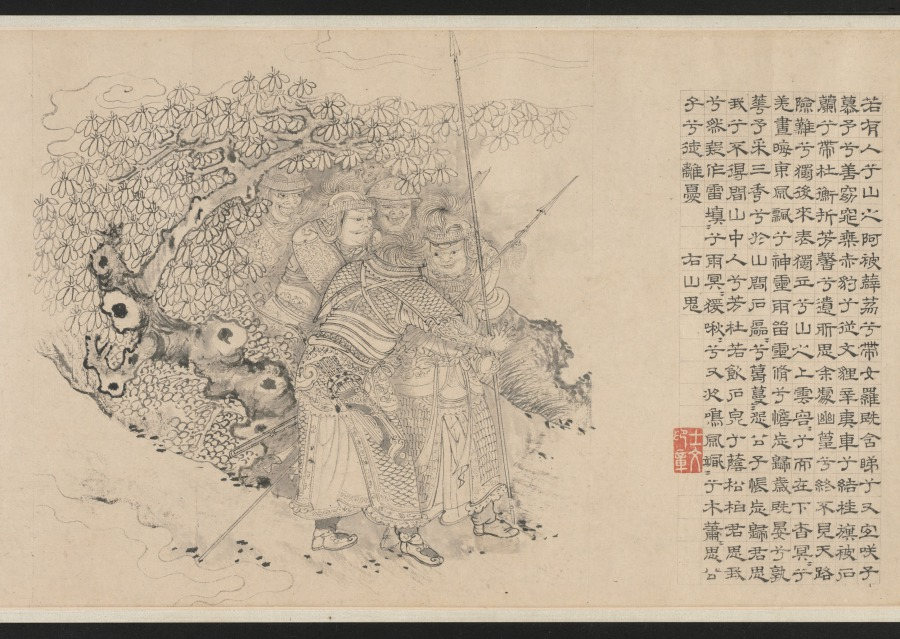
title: Nine Songs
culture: China, Yuan dynasty (1271-1368)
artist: Zhang Wo (Chinese, active c.1336–after 1364)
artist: Chu Huan (Chinese, active 1361)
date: 1361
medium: handscroll; ink on paper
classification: Painting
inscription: 7 colophons and 47 seals: 1 colophon, dated 1361, and 28 seals of Chu Huan 褚奐 (active c. 1361); 1 colophon, dated 1785, and 1 seal of Lu Shihua 陸時化 (1714-1779); 2 seals of Lu Yü-ch'ing (18th c.); 1 colophon, dated 1935, of Ye Gongchuo 葉恭綽 (1881-1968); 1 colophon, dated 1935, of Wu Hufan 吳湖帆(1894–1968); 1 colophon, dated 1938, and 1 seal of Wang Tongyu 王同愈 (1856-1941); 1 colophon, dated 1941, of Wu Huayuan 吳華源 (1893-1972); 1 colophon, dated 1942, and 9 seals of Xu Bangda 徐邦達 (1911–2012); 1 colophon, dated 1942, of Lang Jingshan 郎靜山 (1892-1995); 1 colophon, dated 1944, of Tang Yun 唐雲 (1910-1993); 6 seals of Wang Jiqian [C.C. Wang] 王季遷 (1907–2003).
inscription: Text of The Nine Songs written by Chu Huan at the end of each section.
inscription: 右離騷九歌圖，宋龍溟居士李公本，淮南張渥叔厚所畫妙絕當世。家藏請予書其辭目識于左。至正二十一年辛醜三月旦河南褚奐記。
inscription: Colophon by Lu Shihua 陸時化 (1714–1789): This scroll is fortunate to have been handed down from collections of the right people. Now, after 500 years, its condition is as good as when it was painted. I acquired this from Mr. Shen Guiyu [1673-1769], the President of the Board of Rites. The label is in his handwriting when he was 95 years old. I submit that Chu Huan (t. Shiwen) of the Yuan Dynasty was a native of Qiantang. His "seal" and li writings are in the style of Wu Rui. For example, in [Chu Kuei's] Ming ji lu [A list of masterpieces] is recorded the stele commemorating the restoration of the prefectural school of Kun-shan, the text of which was composed by Yang Weizhen in the twenty-first year of Zhizheng [1361]; and the calligraphy as well as the title in li style was by Chu Huan, who was at that time an assistant judge of the prefecture of Haining in the circuit of Hangzhou. Zhang Wo's zi is Shuhou (叔厚). His literary name is Zhen Qisheng (贞期生). According to [Gu Ying's] Yu shan cao tang ya jii, he liked to paint in the bai-miao or the "pure delineation" style after the method of Li Longmian [Li Gonglin 李公麟], which finds no peer among the ancient masters. This is agreed upon [by Pei Ch'iung] in his Qing jiang zhi who praised [Zhang Wo] as being quite learned and well-versed in many branches of the arts, especially figure painting. Recorded by Lu Shihua [The mountain dweller], listening to the pine, in the twelfth month of the yisi year [1785].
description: Painted in the baimiao, or fine-line drawing style, this ancient work demonstrates the literati’s use of abstract calligraphic brushwork for self-expression. The subject of the “Nine Songs”—songs associated with shamanistic rituals in the ancient Chu kingdom—had traditionally provided artists with myths and legends that they could explore and reinterpret in their own works.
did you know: Divided into eleven sections, the scroll contains illustrations by painter Zhang Wu followed by a transcription of the relevant verse by calligrapher Chu Huan.